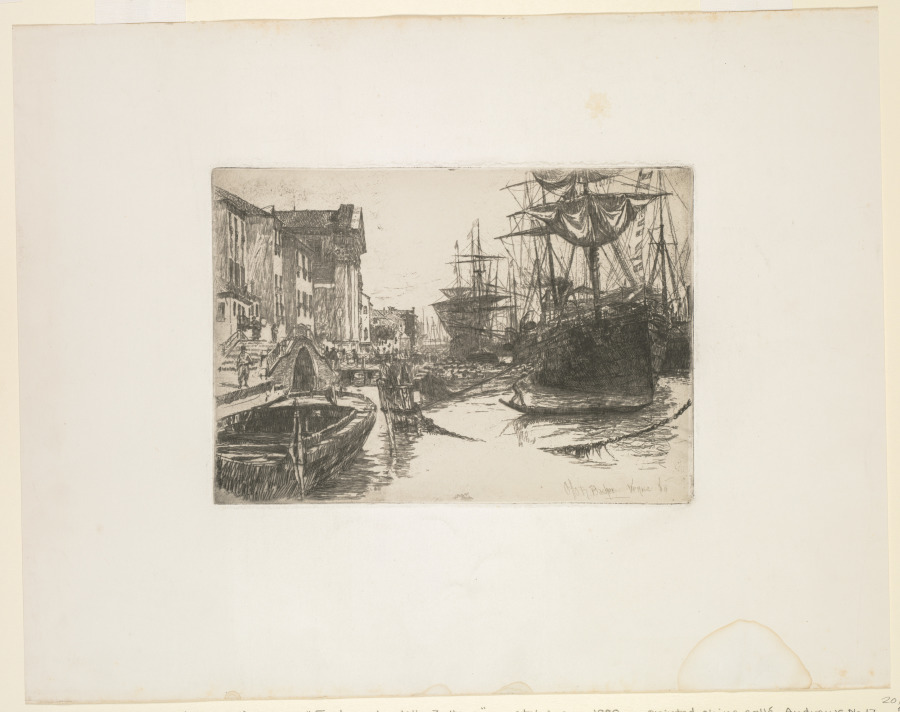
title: Fondamenta della Zattere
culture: America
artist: Otto H. Bacher (American, 1856–1909)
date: 1880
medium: etching on chine collé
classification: Print